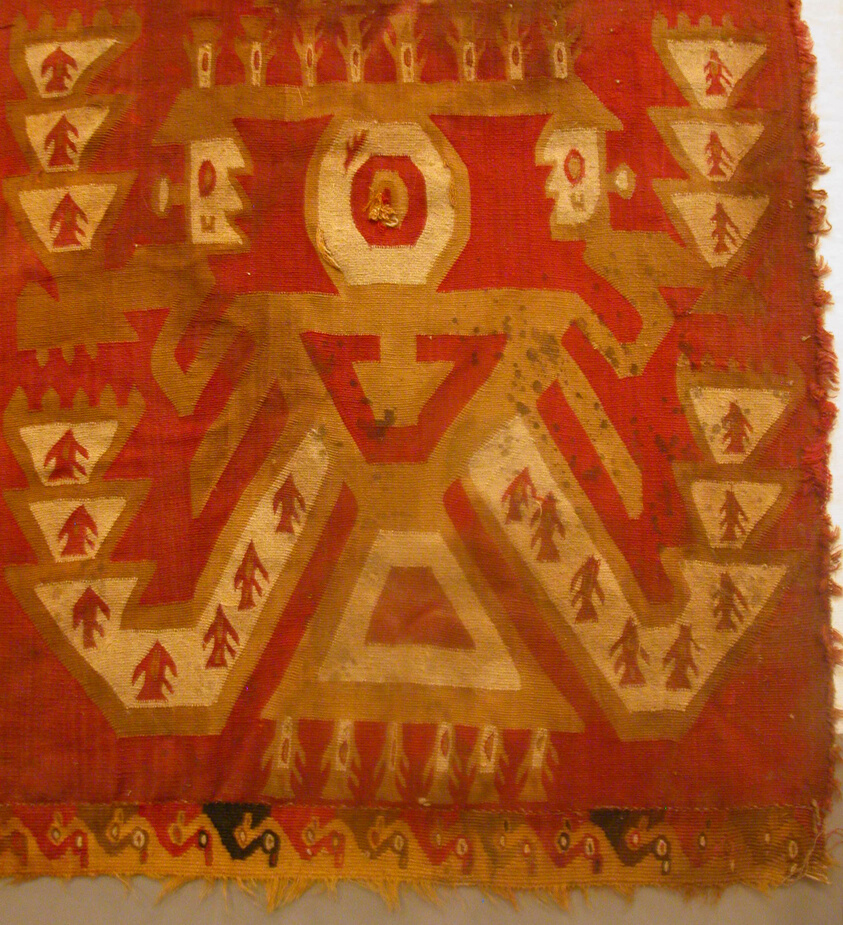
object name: Costume and Accessories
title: Tunic Fragments (?)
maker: Peru, Probably north or central coast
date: A.D. 1000/1476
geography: Peru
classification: textile; weaving; costume; dress (garment); clothing